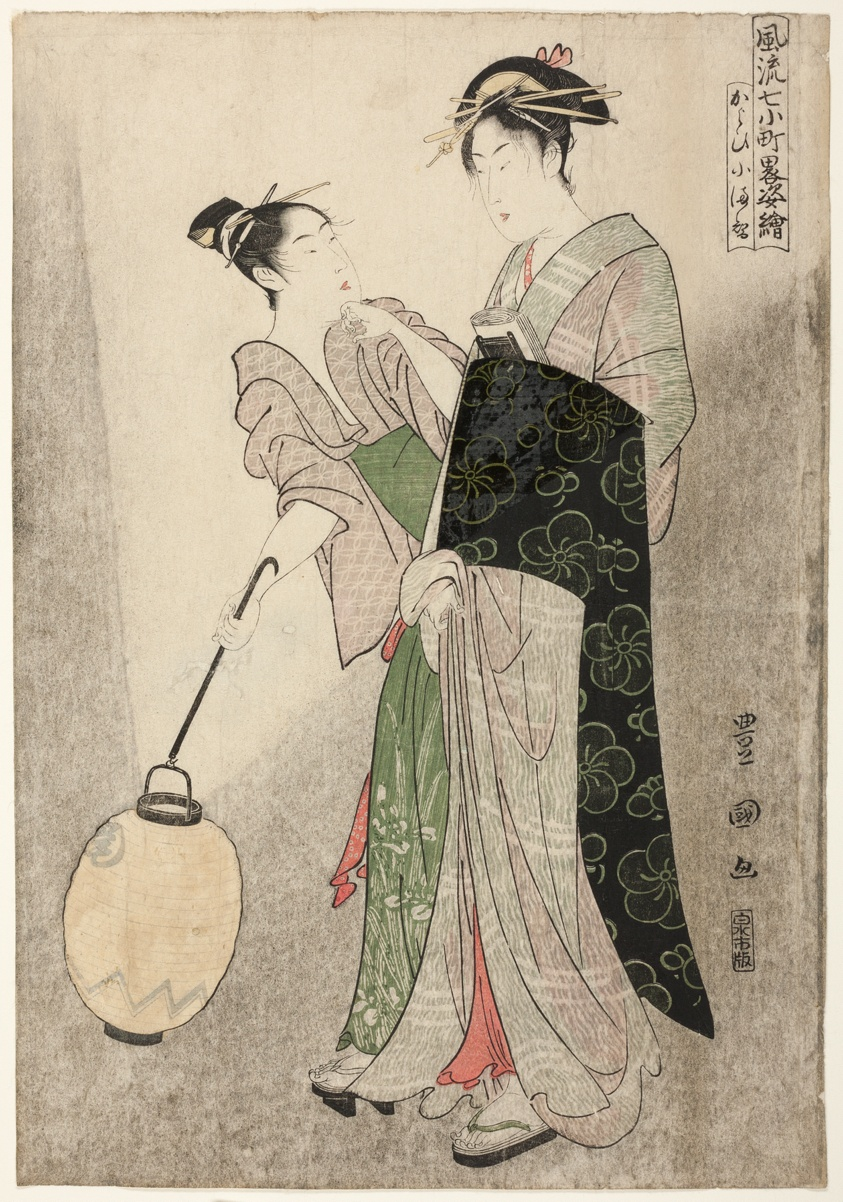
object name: Print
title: Courting Komachi (Kayoi Komachi), from the series Seven Fashionable Figures of Ono no Komachi (Furyu nana Komachi yatushi sugata-e)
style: Japanese (culture or style)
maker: Utagawa Toyokuni I 初代 歌川 豊国; Japanese, 1769–1825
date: Edo period (1615–1868), about 1792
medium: Color woodblock print; oban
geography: Japan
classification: woodblock print; print; asian art